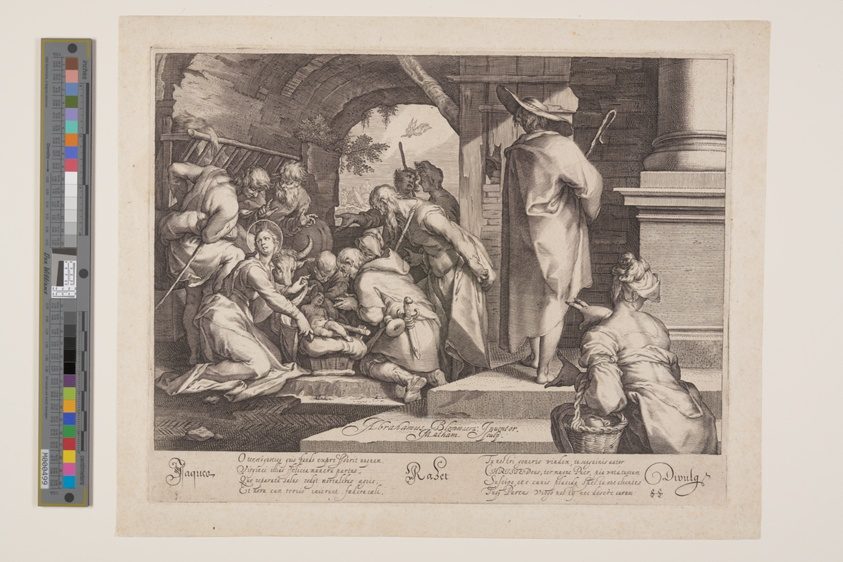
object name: Print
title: The Adoration of the Shepherds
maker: Jacob Matham (Dutch, 1571–1631); after Abraham Bloemaert (Dutch, 1566–1651)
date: c. 1597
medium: Engraving on ivory laid paper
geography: Netherlands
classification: print; paper; prints and drawing; engraving